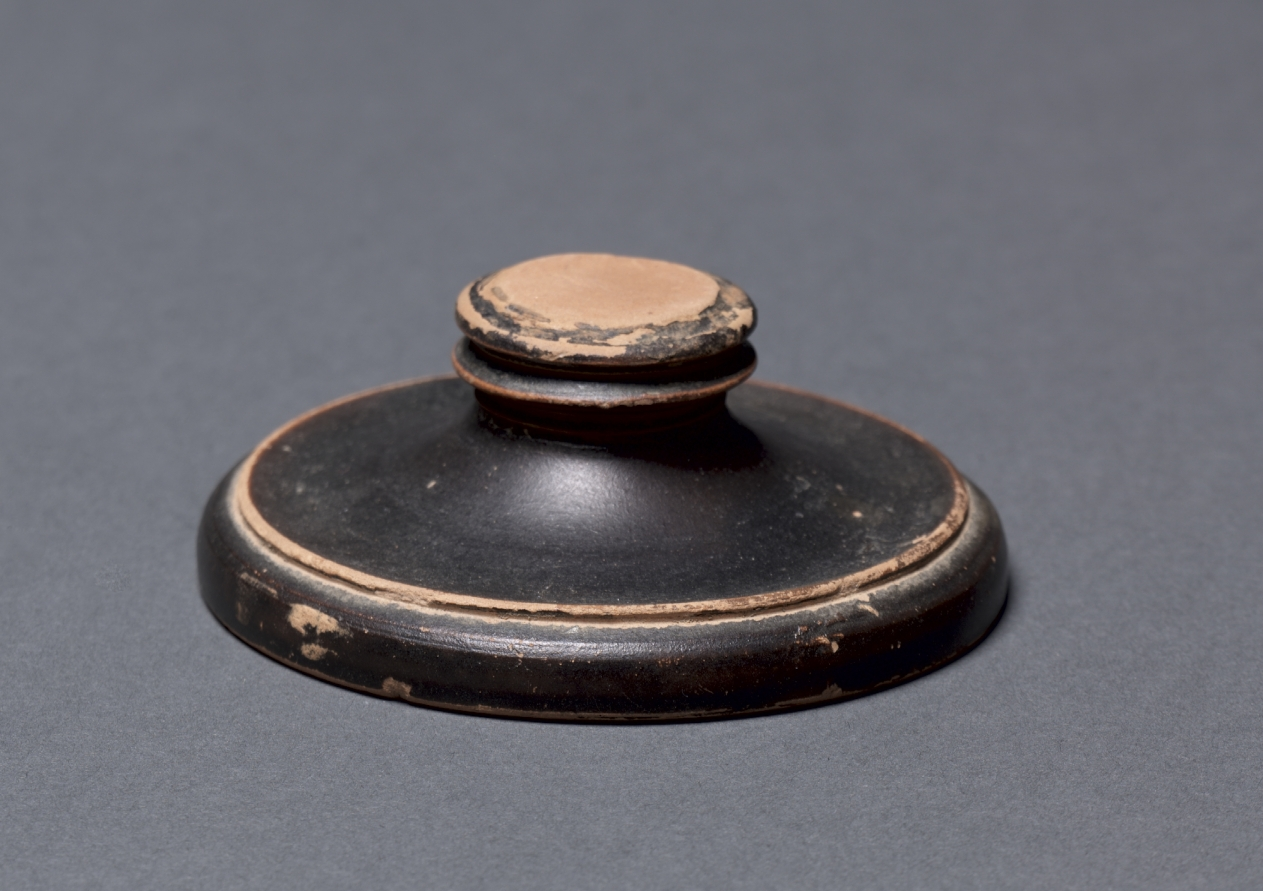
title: Foot of a Red-Figure Oinochoe (Wine Jug)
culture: South Italian (Campanian?)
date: 300s BCE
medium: ceramic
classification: Ceramic